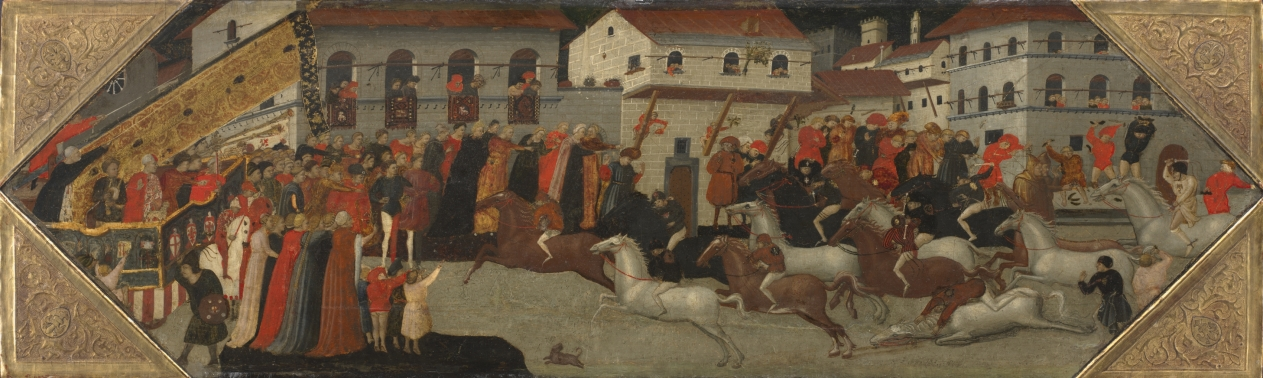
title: Panel from a Cassone: The Race of the Palio in the Streets of Florence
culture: Italy, Florence, 15th century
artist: Giovanni Francesco Toscani (Italian, c. 1380–1430)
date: 1418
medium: tempera and gold on wood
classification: Painting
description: A cassone was a wooden chest used for the storage of clothing, an essential piece of furniture in Italian homes during the Renaissance and often produced in matched sets. The cassone was often made on the occasion of a marriage and elaborately decorated with painted scenes and gilded moldings. This panel comes from such a painted cassone. It was not uncommon for the painted decoration to represent a memorable event at the time of the marriage. This scene depicts the end of the Palio, a horse race held in the streets of Florence on the Feast of John the Baptist (June 24). The panel from the other side of the cassone is now preserved in the Bargello Museum in Florence and shows the procession of the Palii banners before the race. The cassone commemorates a wedding between members of the Fini and Aldobrandini families in 1418.